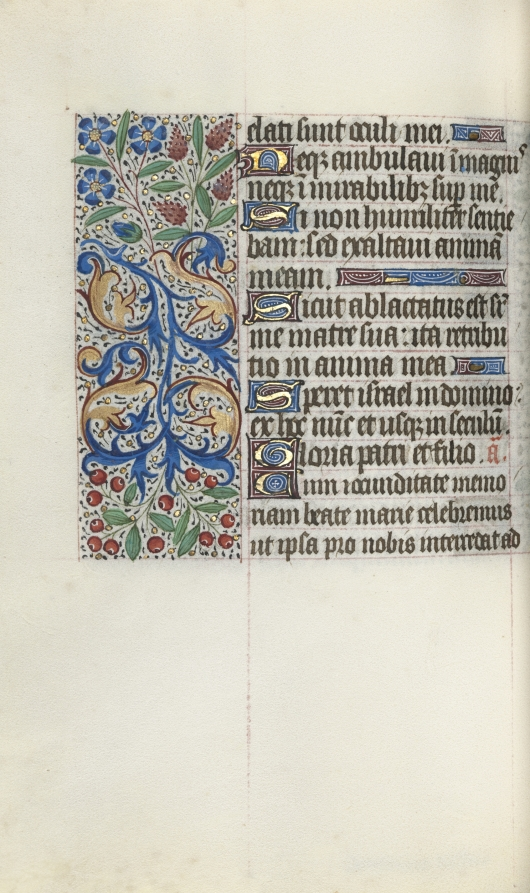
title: Book of Hours (Use of Rouen): fol. 77v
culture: France, Rouen, 15th century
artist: Master of the Geneva Latini (French, active Rouen, 1460–80)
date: c. 1470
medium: ink, tempera, and gold on vellum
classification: Bound Volume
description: In the late 1400s and early 1500s Rouen was an established and important center of book production. The city’s cathedral had a wealthy chapter that spent large sums of money to commission books and to maintain its extensive library. The stationers and booksellers would have likely been concentrated in or near the cathedral precinct. This artist, named after a manuscript now in Geneva, was Rouen’s principal illuminator during the second half of the 1400s.